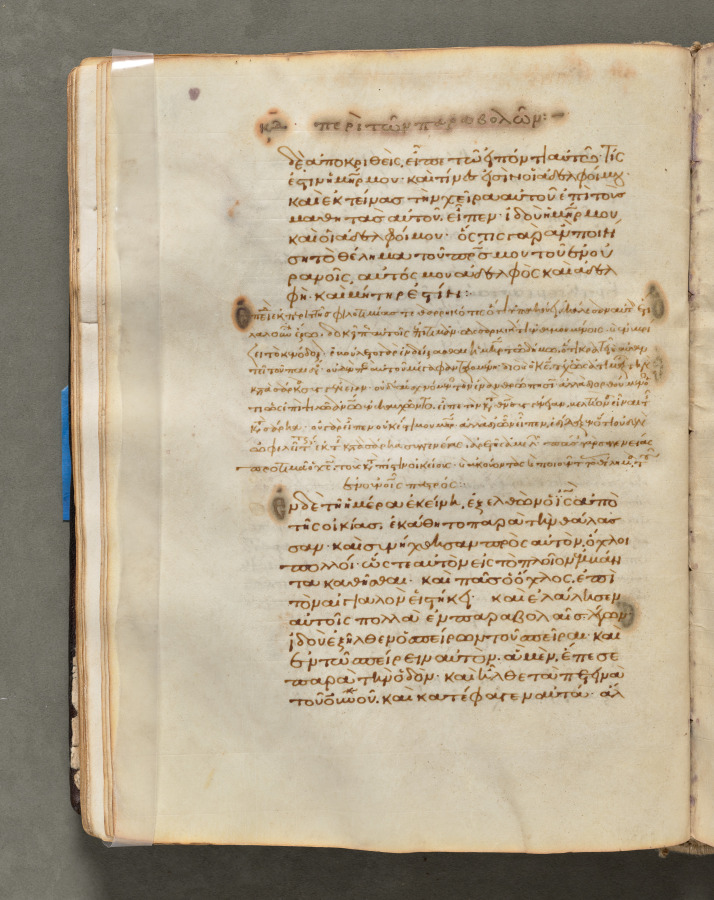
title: Text, folio 56 (verso), from a Gospel Book with Commentaries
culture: Byzantium, Constantinople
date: c. 1000–1100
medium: ink, tempera, and gold on vellum; leather binding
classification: Bound Volume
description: Each of the four gospels in this book opens on a page with brilliantly illuminated borders depicting the author of the text as well as birds-principally peacocks, symbols of the immortality of the soul-and fountains, representing the fountain of life and the salvation of the soul. This volume consists of 428 leaves with texts in Greek. Its level of sophistication suggests that it was probably written and decorated in a monastery in Constantinople.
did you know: Gospel Books were carried in procession through Byzantine churches.